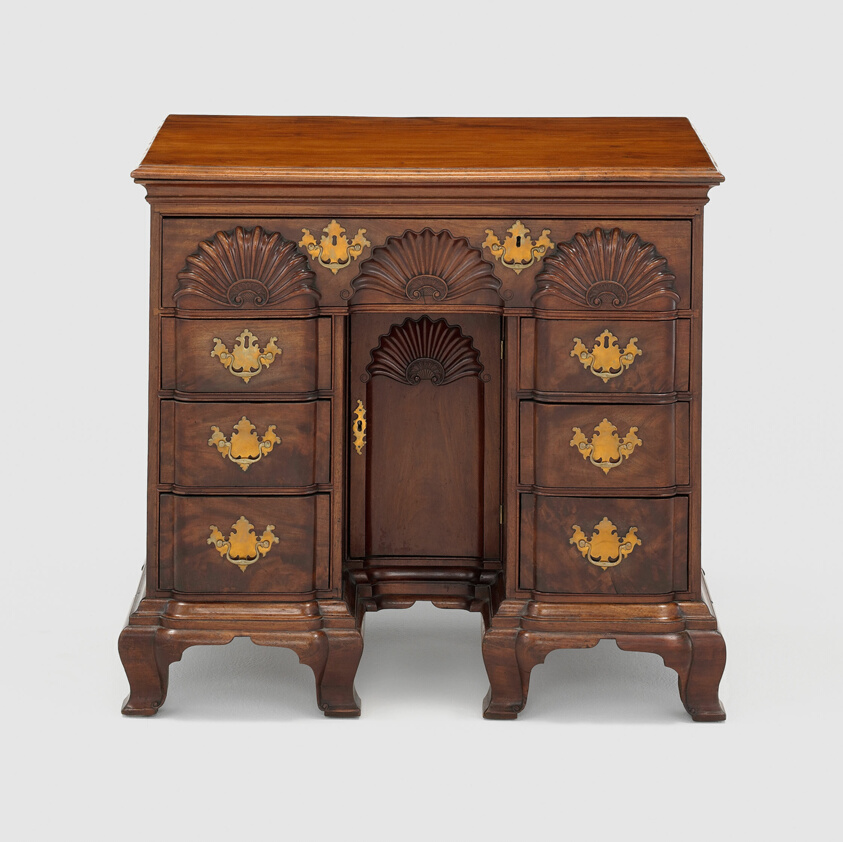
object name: Furniture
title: Bureau Table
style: Baroque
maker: Attributed to John Townsend (American, 1732–1809); Newport, Rhode Island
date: c. 1770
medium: Mahogany, chestnut, and tulip poplar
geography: Newport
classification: table; furniture; american decorative arts; american arts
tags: furniture